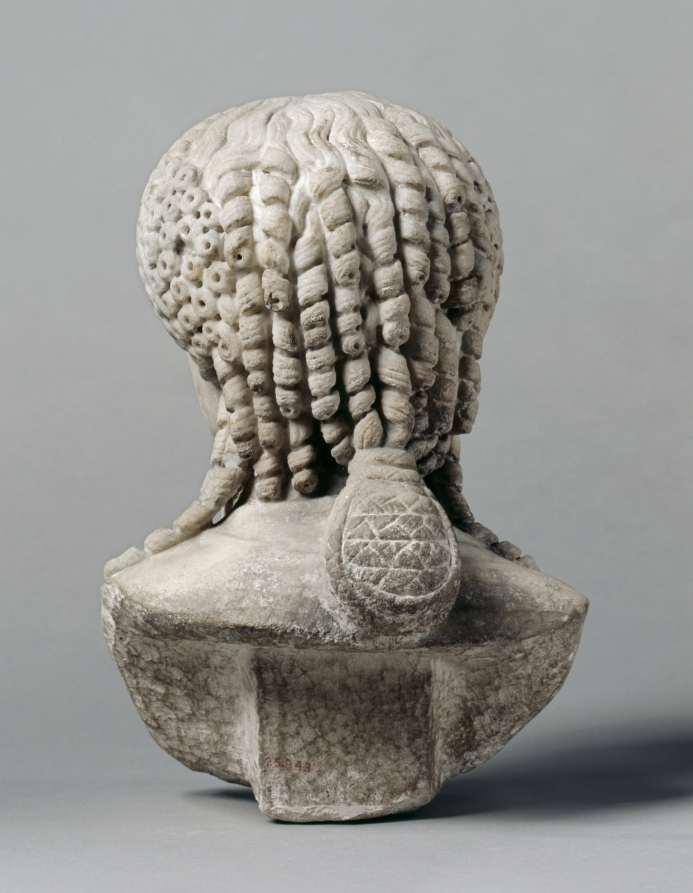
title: Portrait Bust of the Empress Claudia Octavia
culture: Italy, Roman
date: 50–70 CE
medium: marble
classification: Sculpture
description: This portrait bust depicts a young woman whose idealized features and elaborate hairstyle may identify her as the empress Claudia Octavia (r. AD 54-62), unfortunate first wife of the notorious emperor Nero. Over her tunic she wears a stola, a long garment hanging from both shoulders and distinguishing her as a married, upper-class woman. Although beloved by the Roman citizenry and described by the historian Tacitus as “aristocratic and virtuous,” Octavia was eventually divorced and banished by Nero, then ordered put to death.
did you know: The complex coiffure includes four elements: parted waves (top), tight curls (sides), hanging ringlets (shoulders, back), and a braided knot (back).